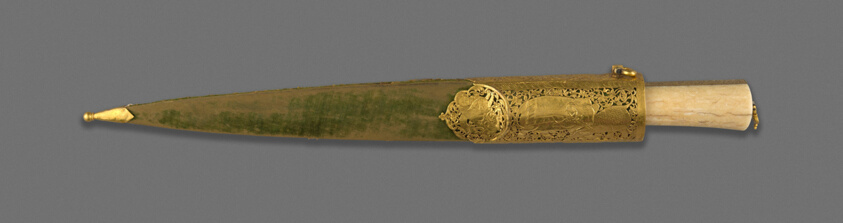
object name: Armor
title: Knife (Kard) with Battling Elephants, Rhinoceros and Lions on the sheath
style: South Asian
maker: India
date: 18th century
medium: Watered steel, ivory, and pierced and chased gold, wood and velvet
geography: India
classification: edged weapon-sword; armor